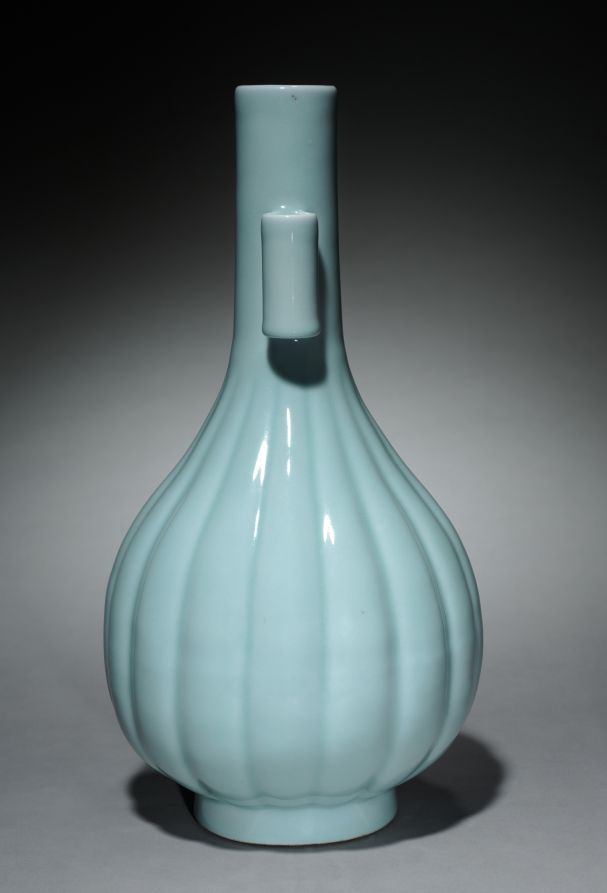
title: Melon-Shaped Fluted Vase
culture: China, Jiangxi province, Jingdezhen kilns, Qing dynasty (1644-1911), Qianlong mark and reign (1736-95)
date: 1736–95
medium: porcelain with clair-de-lune glaze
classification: Ceramic